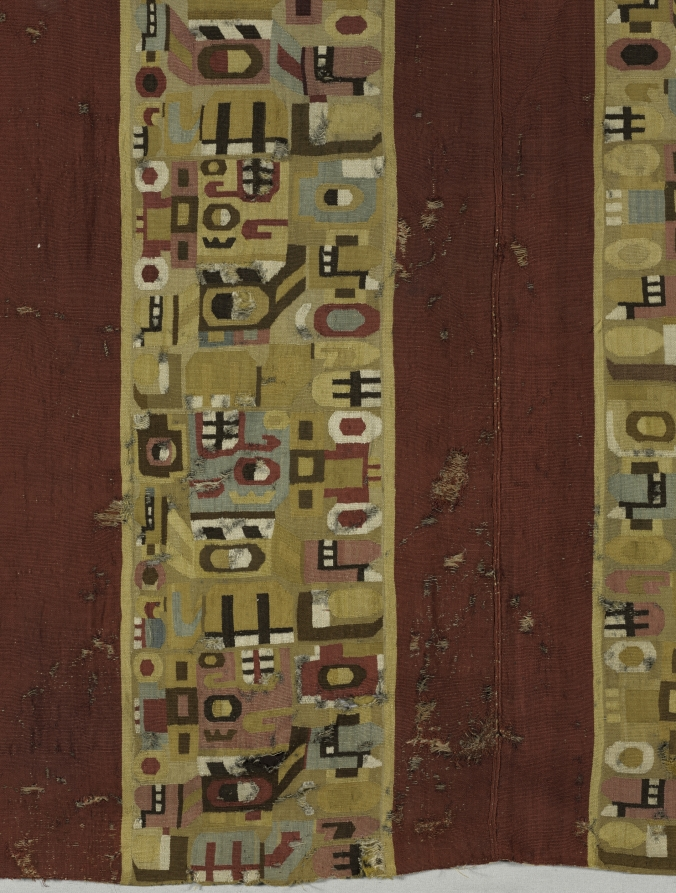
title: Tunic with Sacrificer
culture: South America, Peru, Central Andes, Middle Horizon, Wari people, 7th-11th century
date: 600–1000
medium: camelid-fiber, cotton; tapestry weave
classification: Textile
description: An extremely abstract supernatural sacrifice repeats in different colors and orientations across the body of this tunic, which was shortened on one side in antiquity. Look for the toothy black-and-white mouth in the sacrificer's upward-gazing head; other facial features include a button nose and a vertically divided eye. The figure holds the L-shaped haft of an axe behind its back and, at the front of its body, a short staff with a severed, upside-down human head on the top.